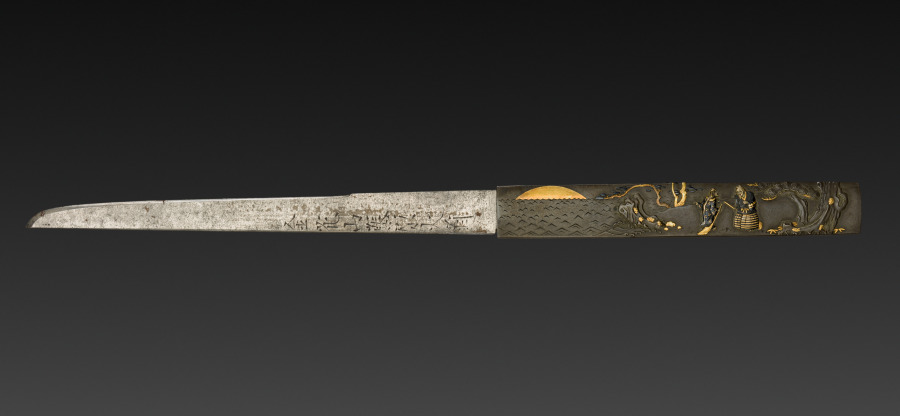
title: Blade with Handle (Kozuka)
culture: Japan, Edo period (1615–1868)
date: 1615–1868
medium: metal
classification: Metalwork